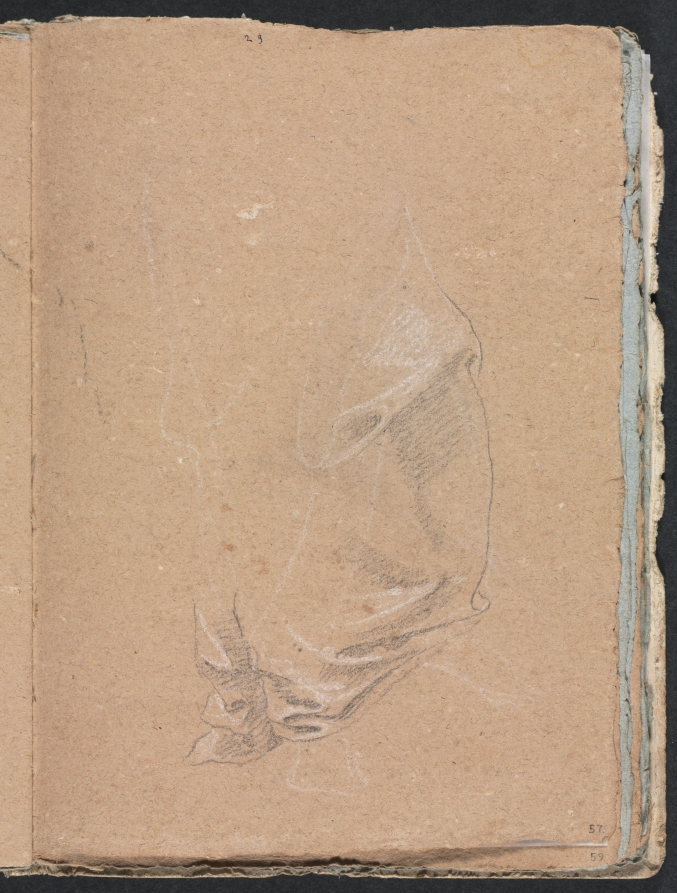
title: Verona Sketchbook: Drapery study (page 57)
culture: Italy, 18th century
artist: Francesco Lorenzi (Italian, 1723–1787)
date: 1760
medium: black chalk with white heightening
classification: Bound Volume